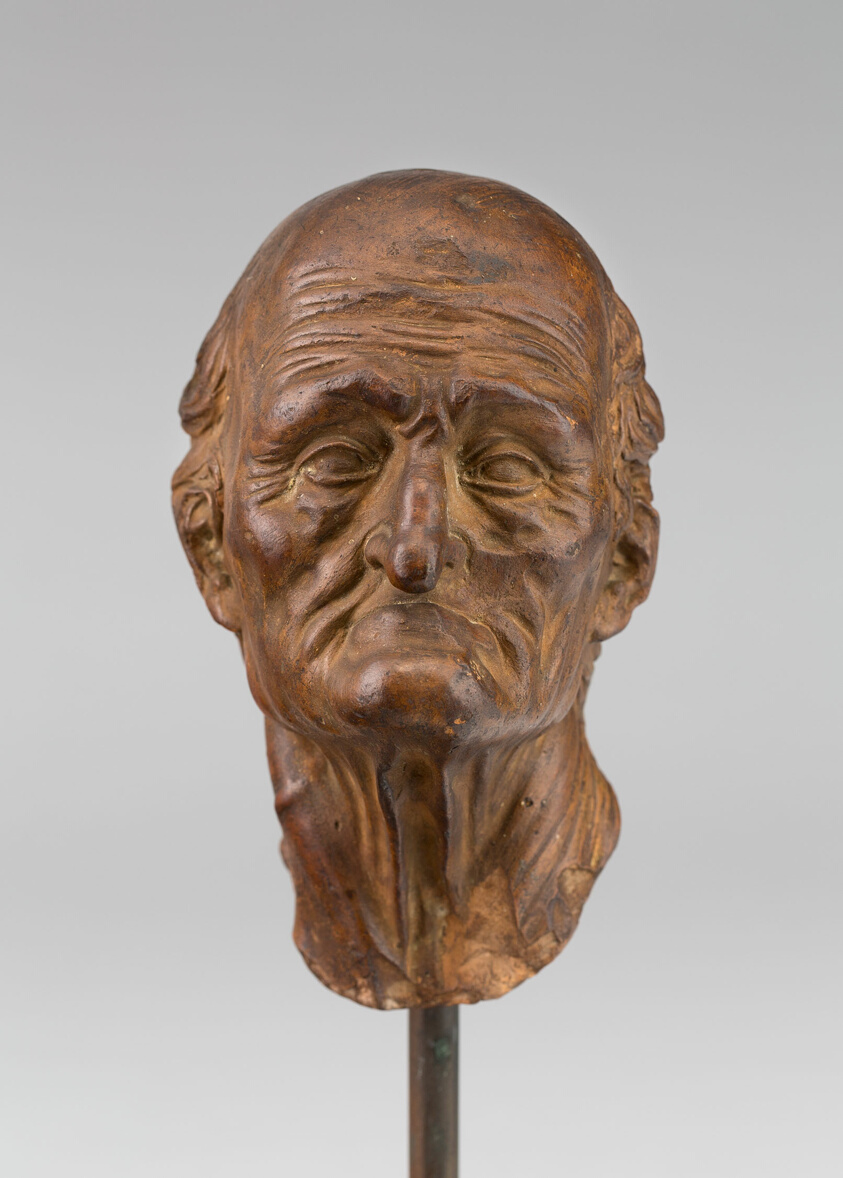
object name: Sculpture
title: Head of a Man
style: 15th century, 16th Century, sixteenth century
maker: Italian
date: 1480/1500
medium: Terracotta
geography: Italy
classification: bust/head; sculpture; portrait; terracotta (sculpture); Italian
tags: portraits: male subject, busts, elderly, head, man, portrait, portraits